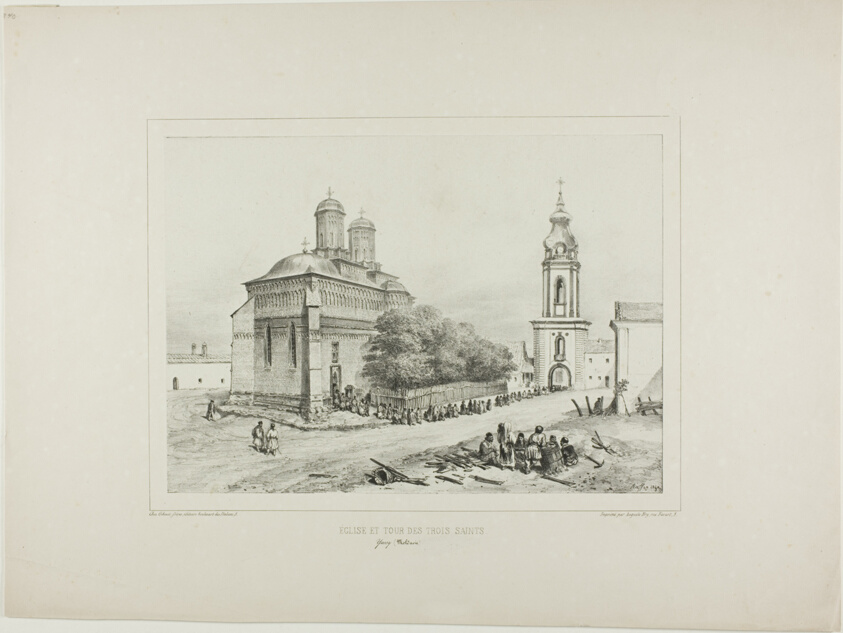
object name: Print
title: Church and Tower of Three Saints, Yassy, Modavia, July 19, 1837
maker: Denis Auguste Marie Raffet (French, 1804-1860); printed by Auguste Bry (French, 19th century); published by Chez Gihaut Frères (French, 19th century)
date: 1840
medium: Lithograph in black on ivory chine laid down on buff wove paper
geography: France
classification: lithograph; print; prints and drawing